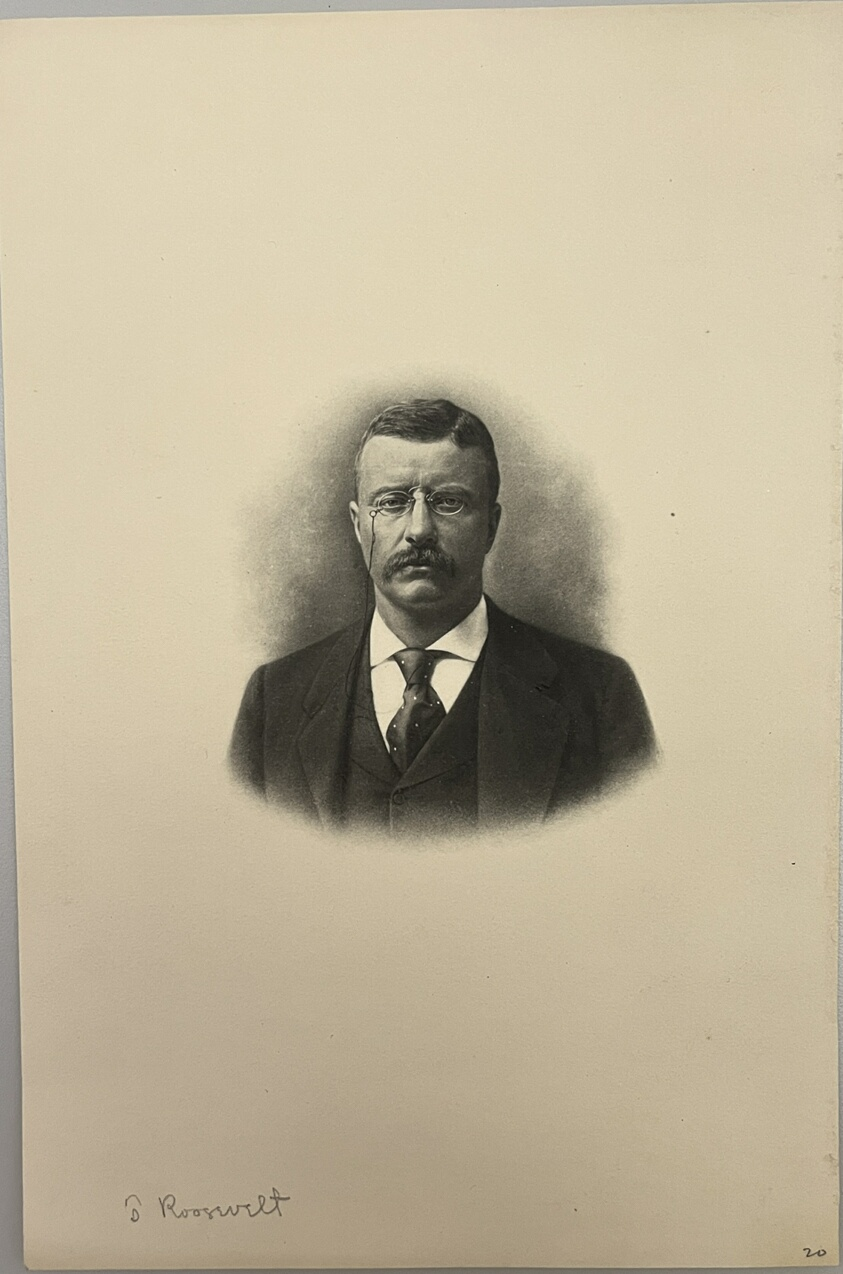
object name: Print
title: Theodore Roosevelt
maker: Artist Unknown (Likely American or British, 19th century)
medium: Photolithograph on paper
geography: United States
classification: reproduction; print; prints and drawing